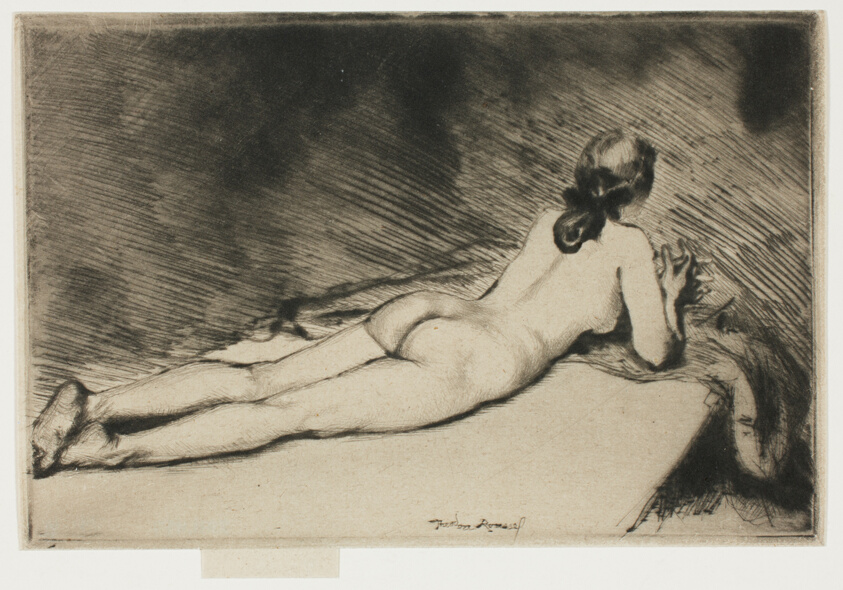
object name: Print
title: Nude Figure Lying Down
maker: Theodore Roussel (French, worked in England, 1847-1926)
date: 1906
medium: Drypoint in black on cream laid paper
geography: England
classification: drypoint; print; prints and drawing